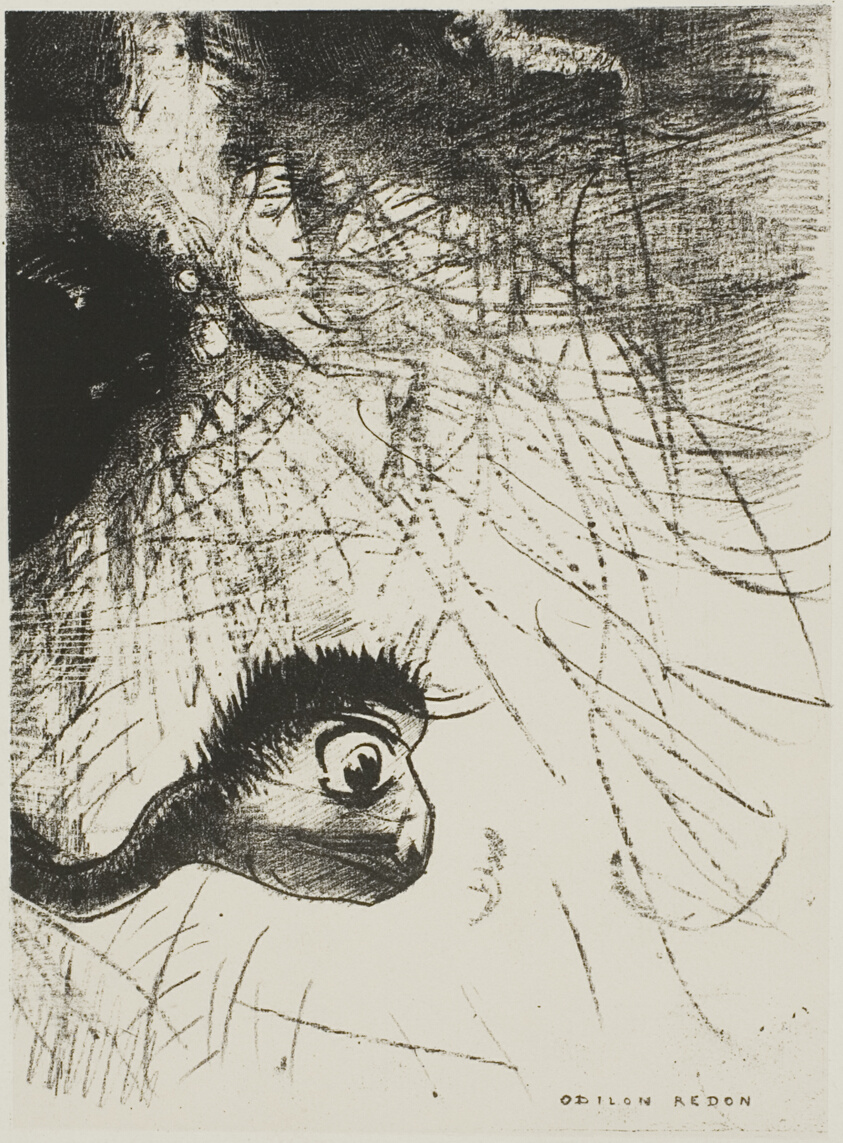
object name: Print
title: Saint Anthony: "Somewhere there must be primordial shapes whose bodies are only images, plate 4 of 6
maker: Odilon Redon (French, 1840-1916)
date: 1889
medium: Lithograph in black on ivory China paper laid down on ivory wove paper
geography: France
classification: lithograph; print; prints and drawing; paper